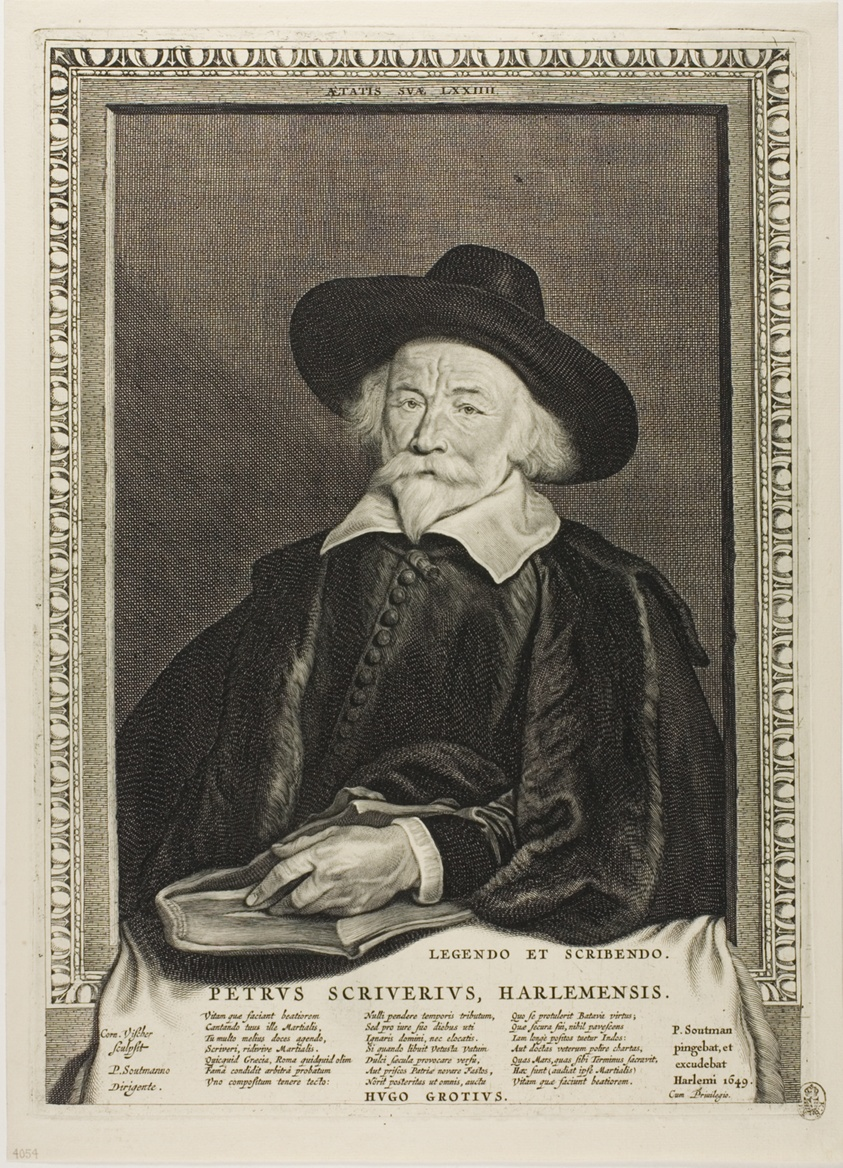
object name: Print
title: Peter Scriverius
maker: Cornelis Visscher (Dutch, c. 1629-1658); after Pieter Claesz Soutman (Flemish, 1580-1657)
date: 1649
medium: Engraving and etching on paper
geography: Holland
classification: engraving; print; prints and drawing